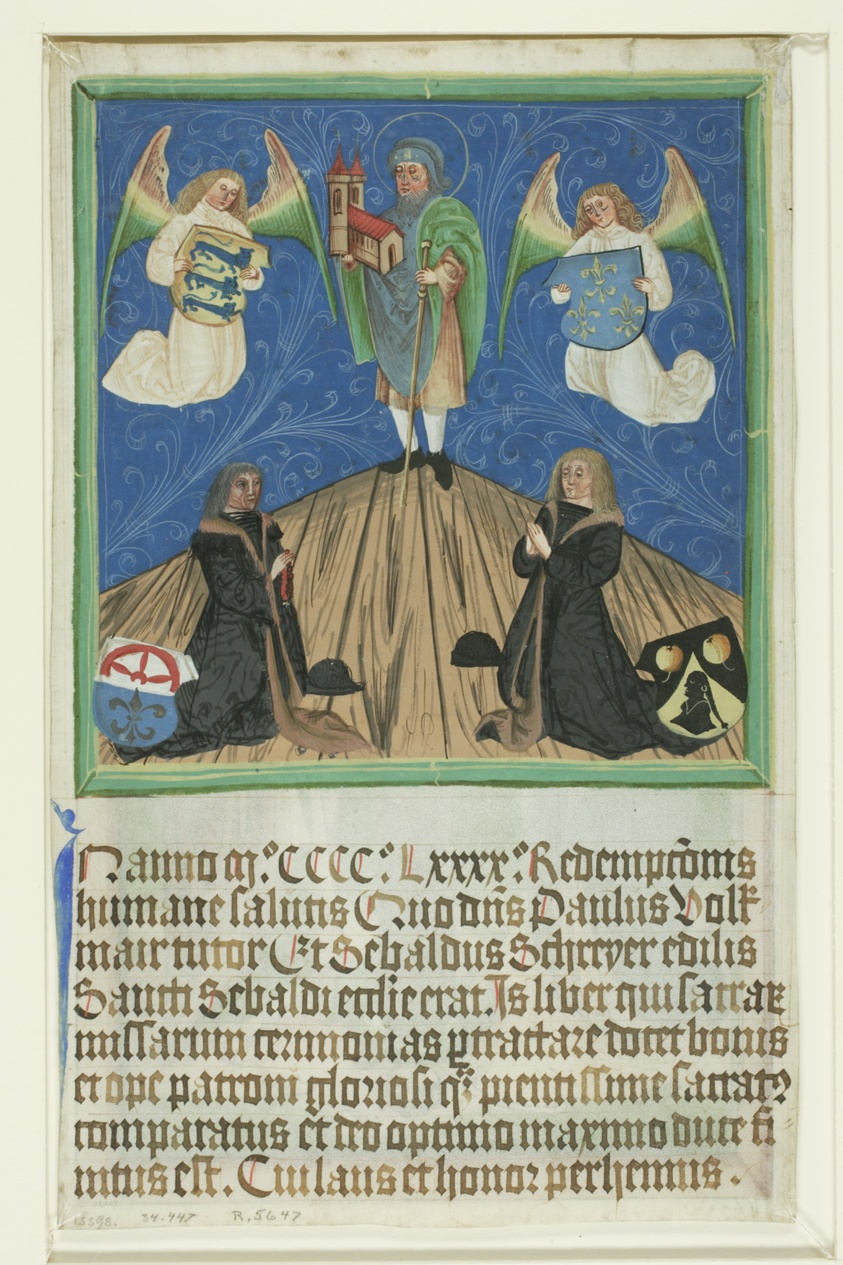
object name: Drawing and Watercolor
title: Crucifixion with the Virgin Mary and Saint John (recto); Saint Sebald with the Donors Paul Volkmayr and Sebald Schreyer (verso)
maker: Unknown Artist; German, 15th century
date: c. 1485–90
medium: Woodcut illuminated on vellum, with miniature on verso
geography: Germany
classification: woodcut; print; prints and drawing; drawings (visual works)